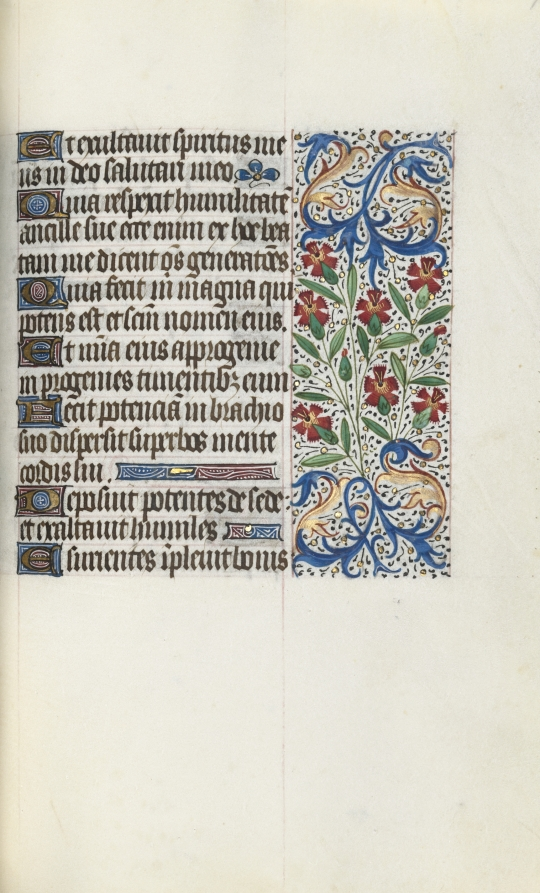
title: Book of Hours (Use of Rouen): fol. 74r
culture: France, Rouen, 15th century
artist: Master of the Geneva Latini (French, active Rouen, 1460–80)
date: c. 1470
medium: ink, tempera, and gold on vellum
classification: Bound Volume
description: In the late 1400s and early 1500s Rouen was an established and important center of book production. The city’s cathedral had a wealthy chapter that spent large sums of money to commission books and to maintain its extensive library. The stationers and booksellers would have likely been concentrated in or near the cathedral precinct. This artist, named after a manuscript now in Geneva, was Rouen’s principal illuminator during the second half of the 1400s.